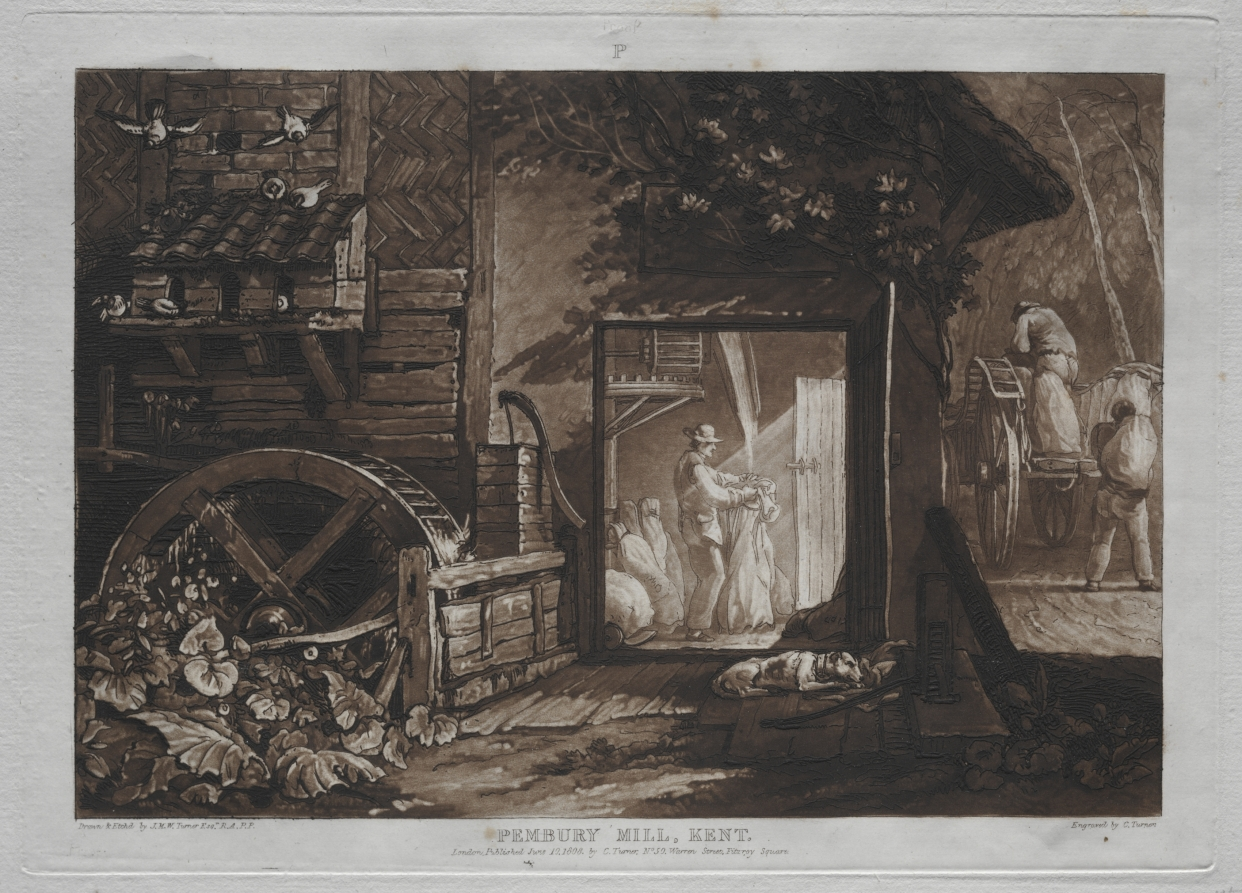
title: Liber Studiorum: Pembury Mill, Kent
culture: England, 19th century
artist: Joseph Mallord William Turner (British, 1775–1851)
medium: etching and mezzotint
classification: Print